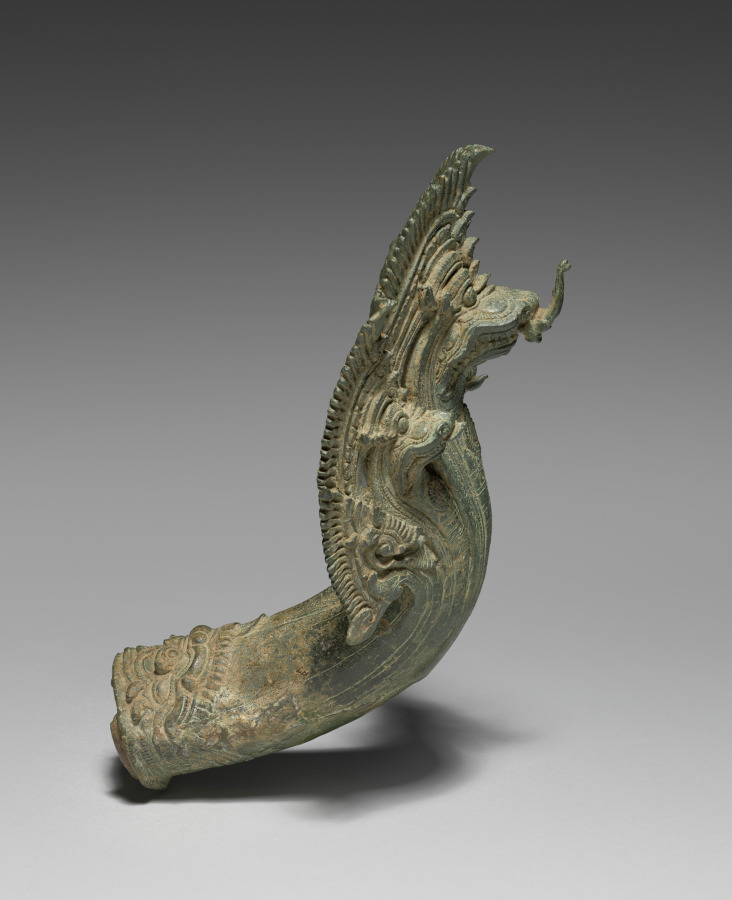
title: Naga Finial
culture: Cambodia, Angkor Wat Period, 12th century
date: 1100s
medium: bronze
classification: Metalwork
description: When members of the royal family or priesthood traveled in a public festival procession or to a temple to make offerings or participate in a ceremony, they would be carried in a palanquin, or a covered litter. Portable objects of veneration, such as bronze images or a sacred fire, were also carried on palanquins. The palanquins had wooden poles, hanging seats or raised platforms, and bronze fittings cast in intricate forms and gilt, lending the palanquins a sumptuous quality. The royal palanquins were typically fitted with multiheaded, serpent-shaped finials at the ends of the poles and corners of the elevated platforms. Naga means serpent in Sanskrit, a language from India selectively appropriated by the Khmer in Cambodia. In their own indigenous mythology, the Khmer people trace their descent from a naga princess and a prince from the island of Java who journeyed to Cambodia. The naga remains a potent emblem for the Khmer nation to this day; it is ubiquitous on Cambodian monuments.